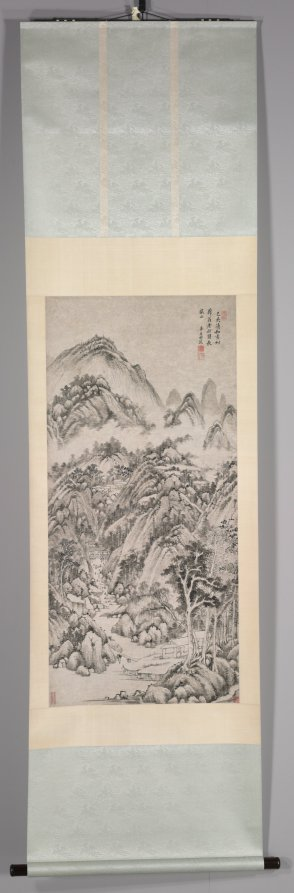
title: Mountain Village Embraced by the Summer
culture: China, Qing dynasty (1644-1911)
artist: Wang Shimin (Chinese, 1592–1680)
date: 1659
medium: hanging scroll, ink on paper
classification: Painting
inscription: Artist's inscription, signature, and 3 seals: [seal] Ouxie 偶諧. In the jihai year [1659], the fourth lunar month, I painted this for T'o-weng, my senior in our literary club, for your amusement and correction. Your junior Wang Shimin. [seals] Wang Shimin yin 王時敏印; Xunzhi 遜之.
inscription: 2 additional seals: 1 of Jiang Gusun [Chiang Ku-sun] 將穀孫 (20th century); 1 of C. C. Wang 王季遷 (1907–2003).